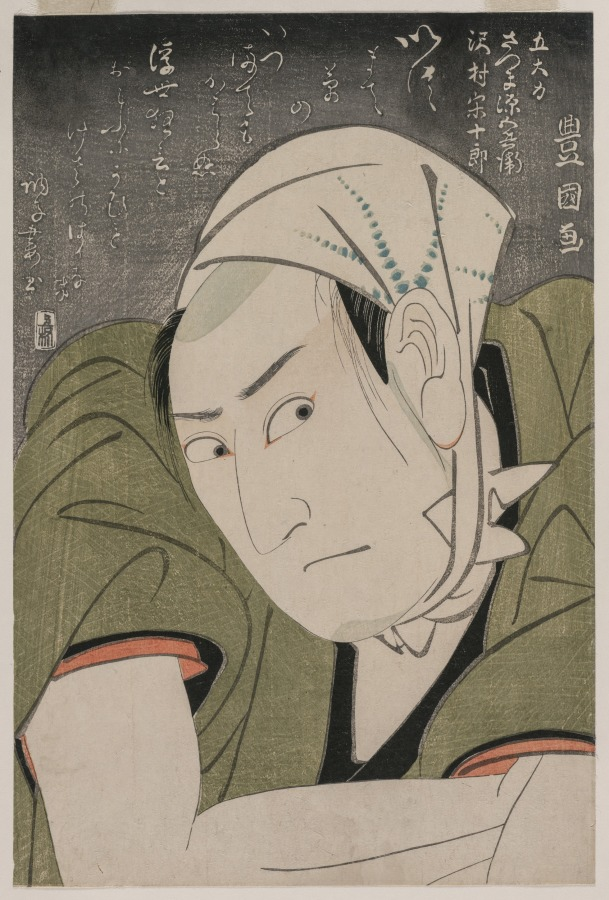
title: Memorial Portrait of Sawamura Sojuro III as Satsuma Gengobei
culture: Japan, Edo period (1615–1868)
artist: Utagawa Toyokuni (Japanese, 1769–1825)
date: 1800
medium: color woodblock print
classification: Print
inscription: Signature: Toyokuni ga Publisher: Uemura